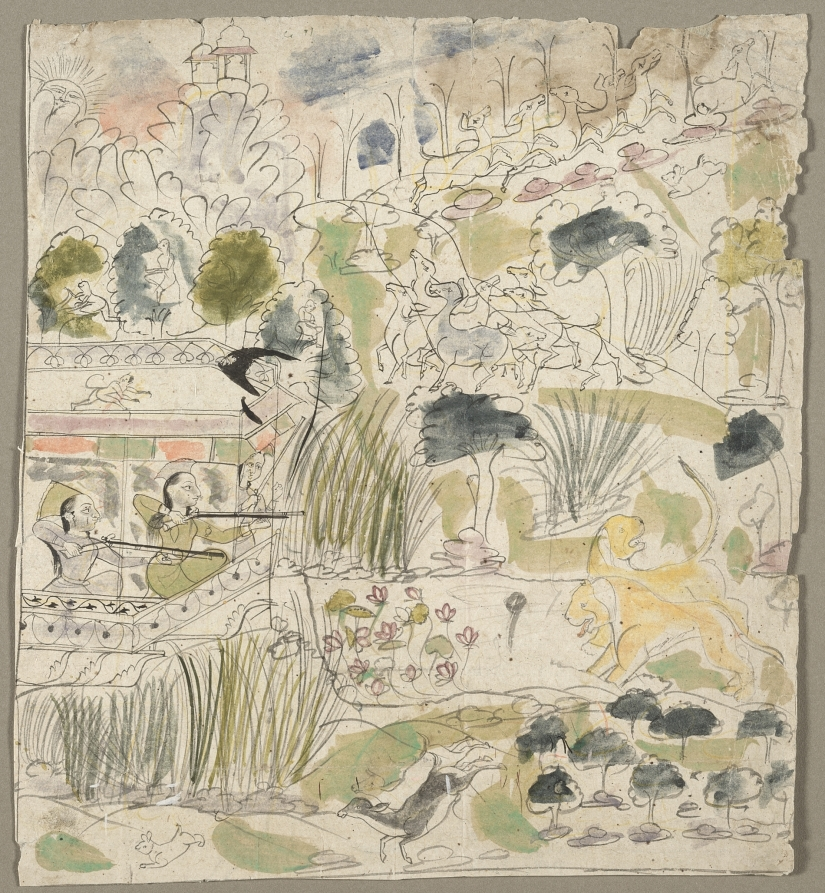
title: Ladies Shooting from a Pavilion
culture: India, Rajasthan, Kota school, 19th century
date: c. 1830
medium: graphite and watercolor on paper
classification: Drawing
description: This may be a study for the painting Ladies Shooting from a Pavilion (1955.48)